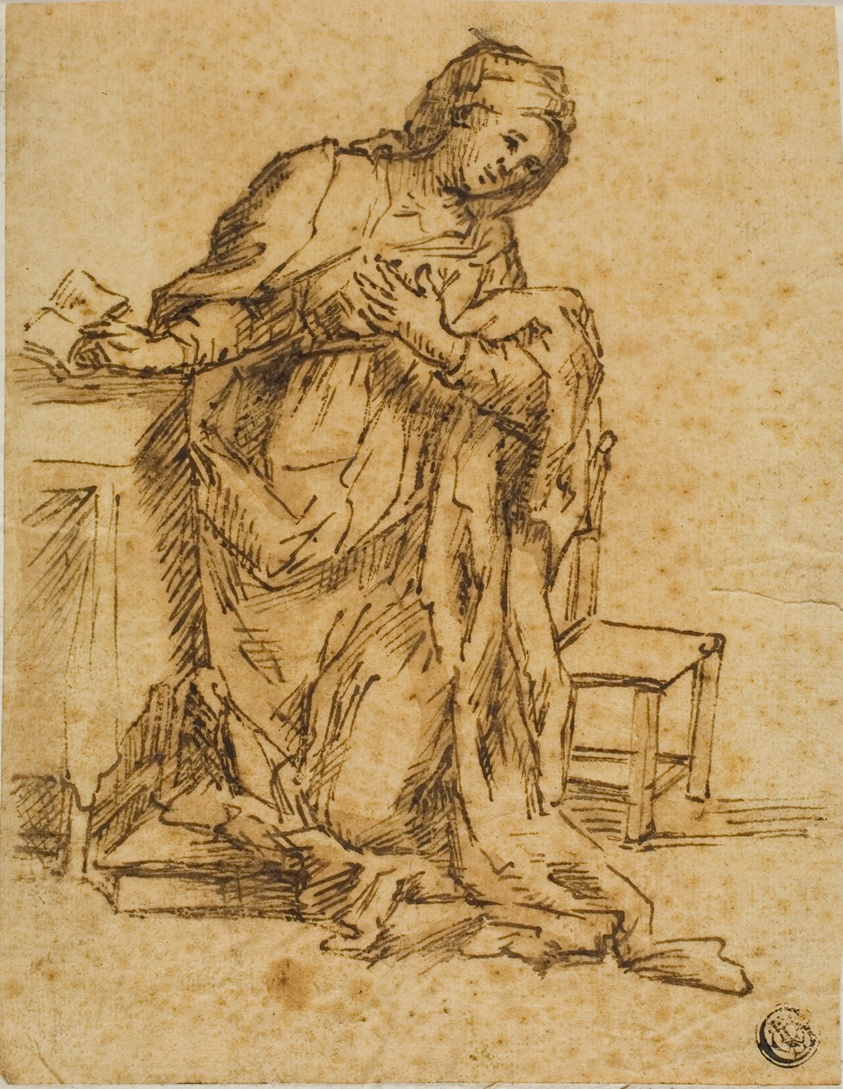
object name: Drawing and Watercolor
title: Virgin Annunciate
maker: Lodovico Carracci (Italian, 1555-1619)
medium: Pen and brown ink with brush and brown wash, on tan laid paper, laid down on ivory laid paper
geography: Italy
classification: pen and ink drawings; drawings (visual works); prints and drawing